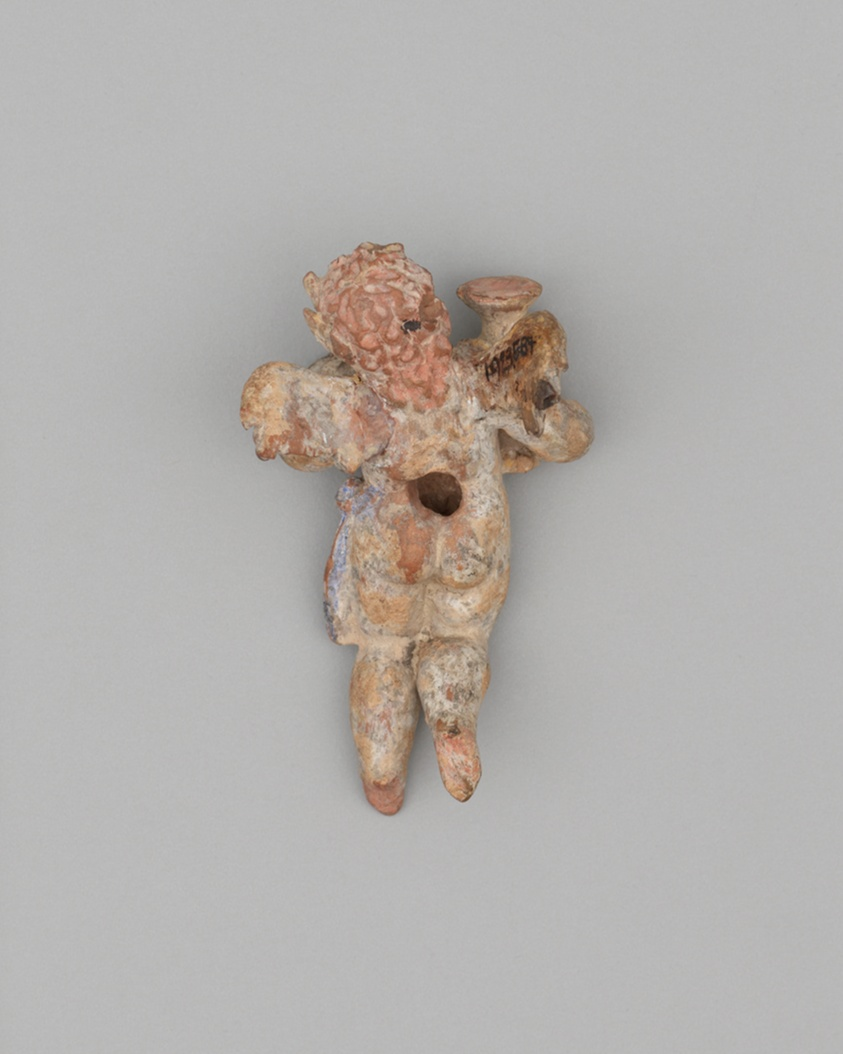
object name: Sculpture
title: Statuette of Eros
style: greek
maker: Greek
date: 3rd/2nd century BCE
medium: terracotta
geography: Greece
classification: earthenware; ceramics; sculpture; ancient art